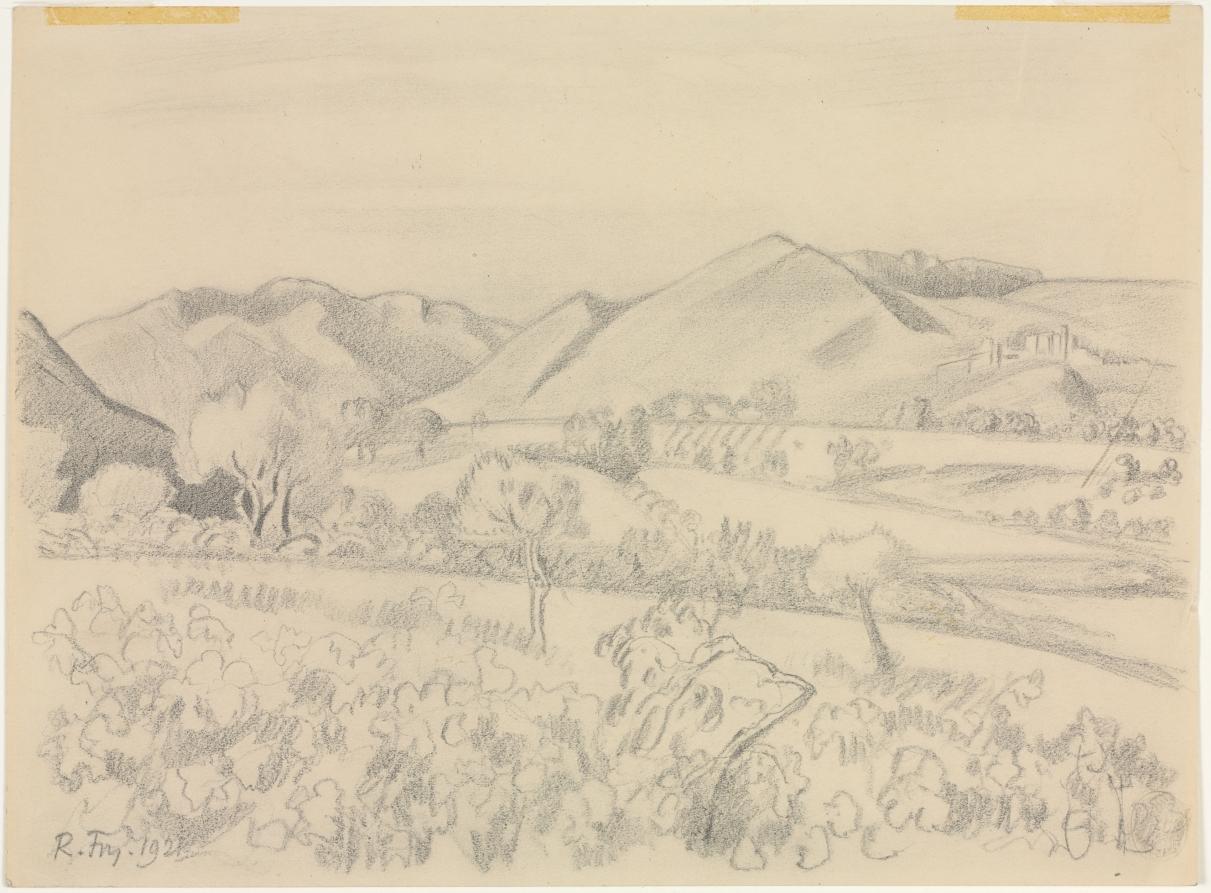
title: Landscape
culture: England, 20th century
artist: Roger Fry (British, 1866–1934)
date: 1921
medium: graphite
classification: Drawing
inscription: Signed and dated 1921